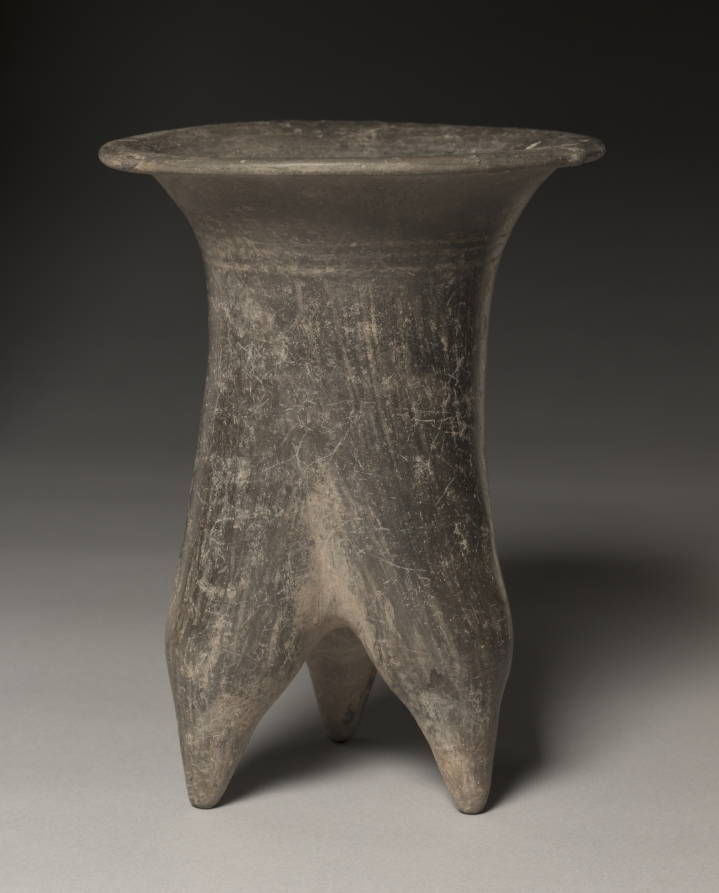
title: Li, Hollow-Legged Tripod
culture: China, Inner Mongolia, lower stratum of the Xiajiadian culture (2200–1600 BCE)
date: 1200–800 BCE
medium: dark gray earthenware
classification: Ceramic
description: This pottery li tripod—which was originally used as a cooking vessel—belongs to the lower stratum of the Xiajiadian culture that flourished in northeast China. Comparable examples with similar shape and proportion have been excavated in Inner Mongolia. A ceramic shape invented and borrowed from central China, li tripod appeared at a later date in the northeast, with limited examples from the late Neolithic period. As an artifact representative of the lower Xiajiadian culture—which was contemporary with the Shang dynasty in central China where bronze production had already been highly developed—pottery li tripod was popular in the northeast during the Bronze Age and was widely spread from the Liaodong to the Liaoxi regions, including Inner Mongolia.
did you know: This vessel not only reveals an interesting relationship between ceramic and bronze shapes but also the cultural impact of central China on the border regions.